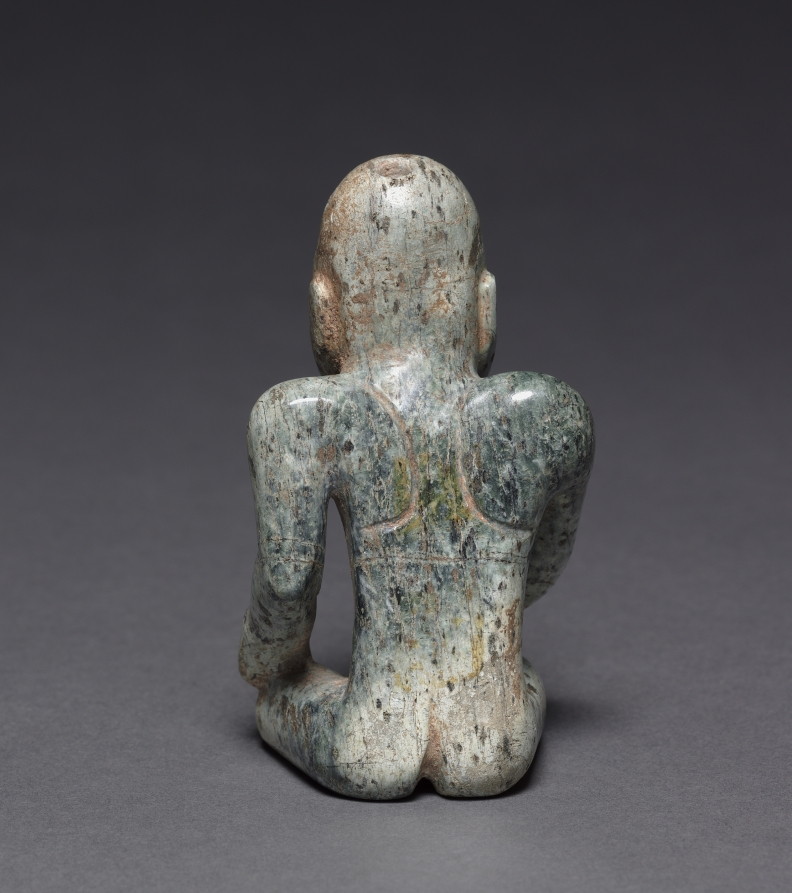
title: Seated Figure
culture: Mesoamerica, Mexico, Olmec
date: 1200–300 BCE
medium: jade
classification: Jade